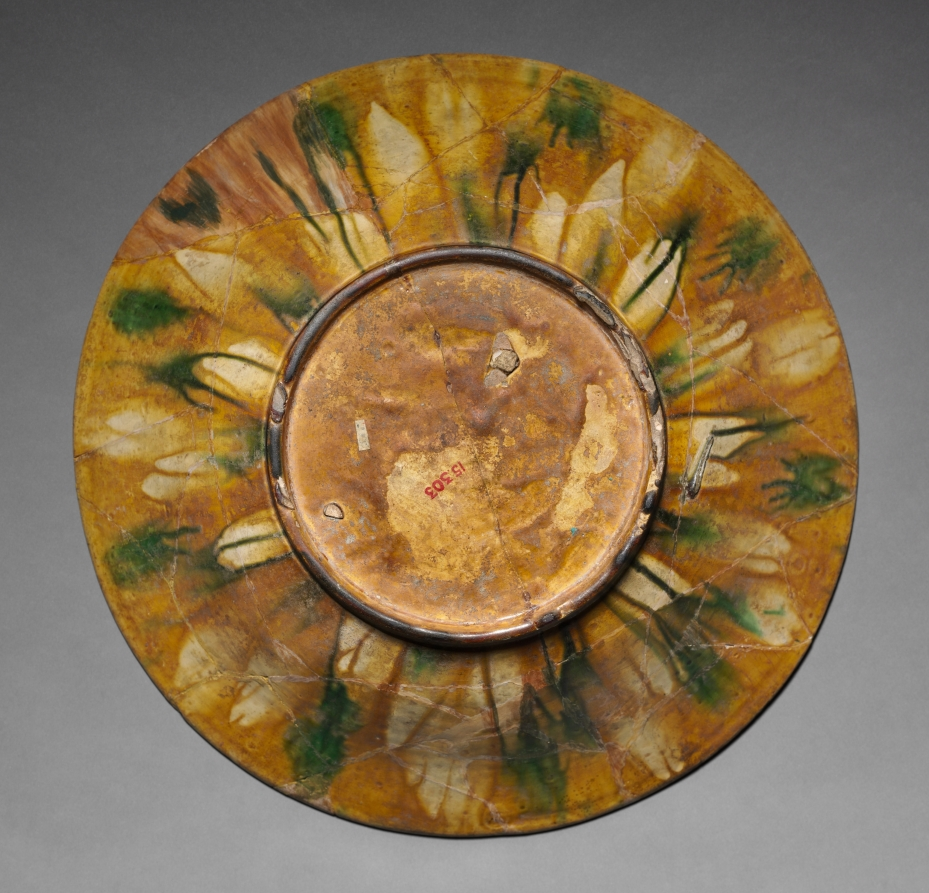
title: Bowl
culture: Iraq or Iran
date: 800s–900s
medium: earthenware with painted underglaze and incised design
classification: Ceramic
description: This large bowl with flaring sides is splashed with yellow, brown, and green pigments, which have run during the firing process, in imitation of Tang Chinese ceramics.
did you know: Look closely: the bowl has incised decoration of a large palmette in the center and a split-leaf scroll pattern just inside the rim.